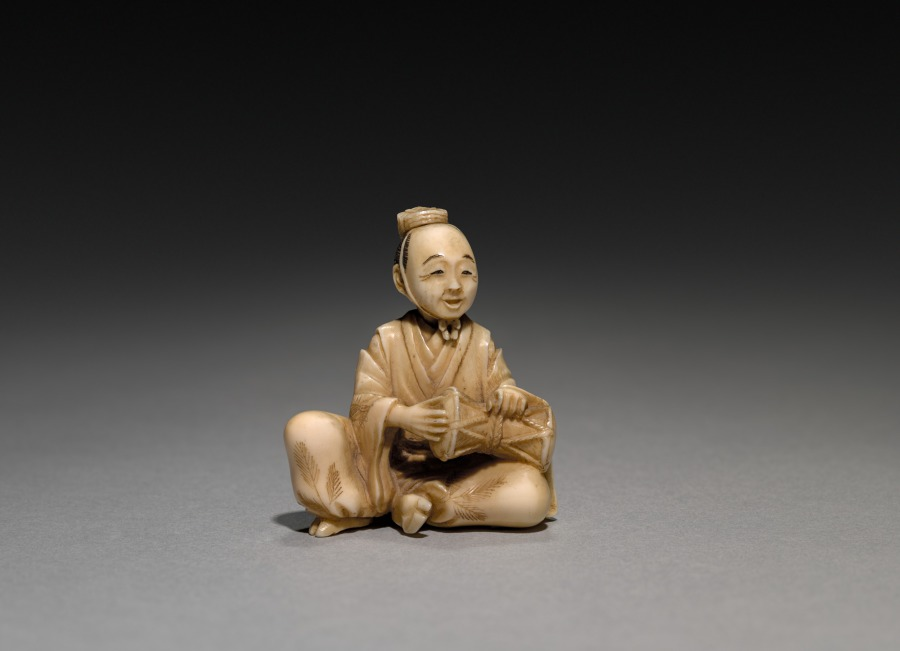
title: Man with a Drum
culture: Japan, Meiji period (1868–1912)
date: early 1900s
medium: ivory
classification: Netsuke